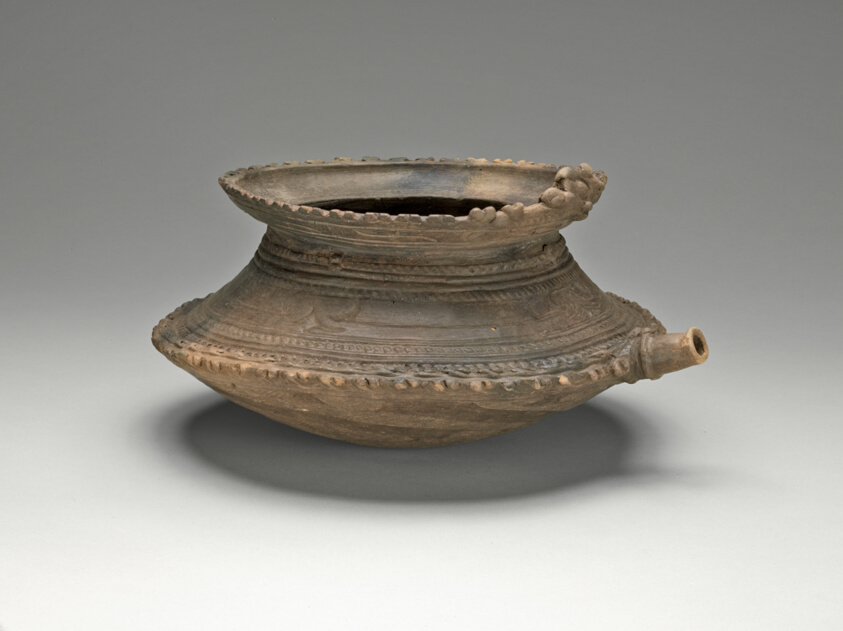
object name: Vessel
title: Pot with Spout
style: Japanese (culture or style)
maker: Japan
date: c. 1000–300 B.C.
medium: Earthenware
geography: Japan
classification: vessel